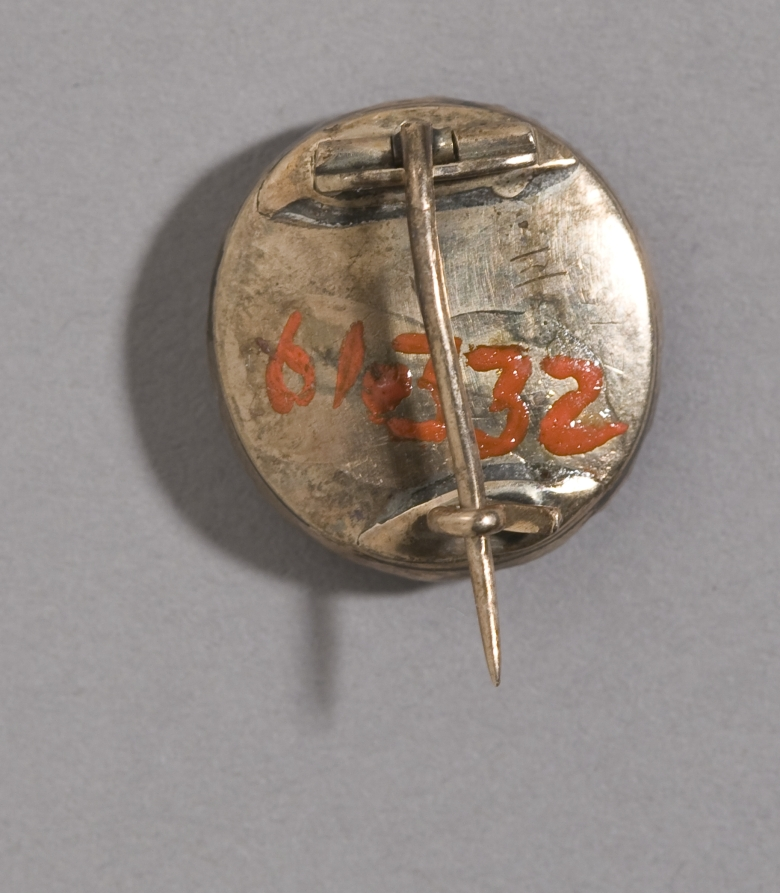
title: Eye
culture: America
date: c. 1830s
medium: watercolor on ivory in a gilt metal frame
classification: Portrait Miniature